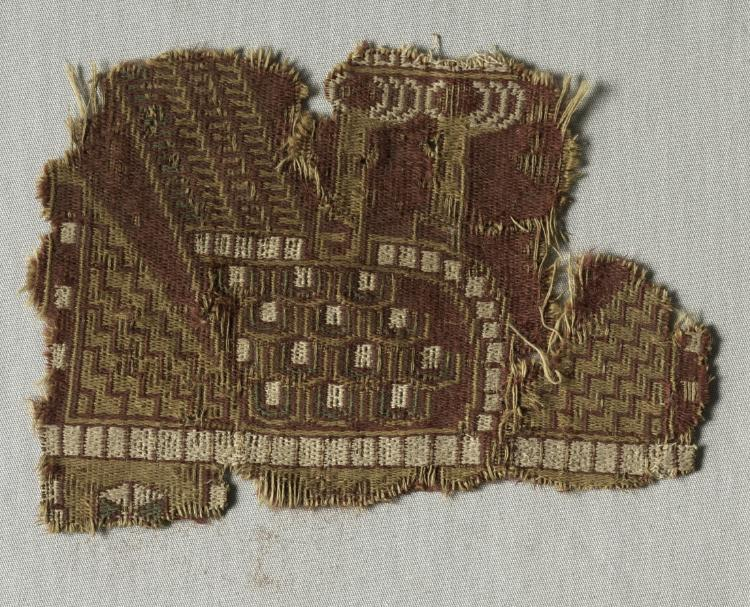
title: Fragment with headless eagle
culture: Iran, Iraq, or Syria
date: 700s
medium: samite: wool and cotton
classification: Textile